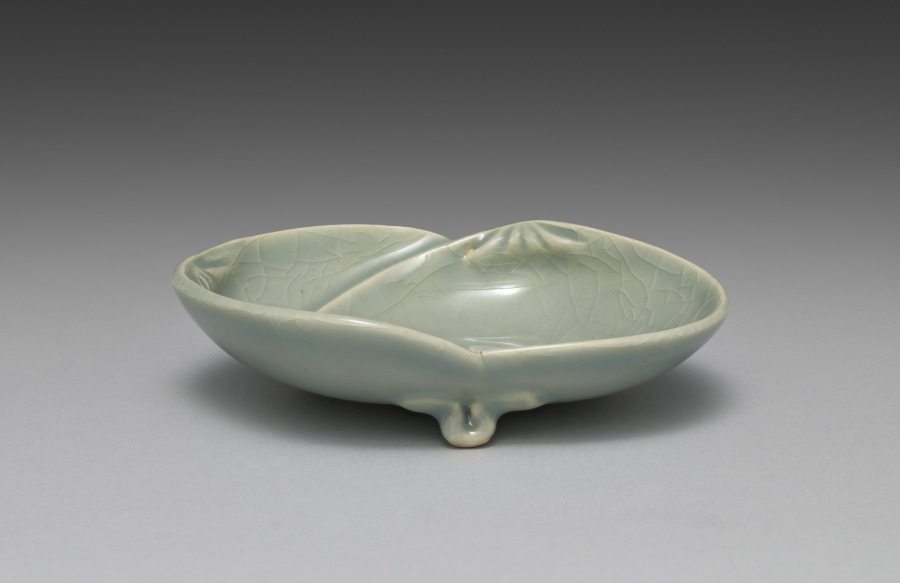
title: Dish from Saucers with Matching Shells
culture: Japan, Meiji period (1868–1912)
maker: Seifū Yohei III (Japanese, 1851–1914)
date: 1893–1914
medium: Porcelain with molded design and green crackled glaze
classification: Ceramic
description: Yohei III’s main output for his sophisticated clientele was in the form of tea sets and dining sets. He created a range of dishes in green glazes. He often produced in pairs, sets of five, or sets of ten. The set of five dishes with a more complex form is described as having a “water-colored glaze” (mizuiroyū). These are shaped like clam half shells, a reference to a game in which shell halves painted with narrative scenes or a variety of motifs must be matched back together by the players. The dishes have molded details to articulate the shell forms, and the crackling across each shell adds another dimension to the surface. Each dish is set on three small feet, formed by a pinched piece of clay and attached to an unglazed area on the underside of the dish. Curiously, while four of the dishes are stamped with the artist’s mark, one has instead a signature carved into the base.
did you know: The saucers are meant to look like matched halves of clam shells in reference to a once popular game.